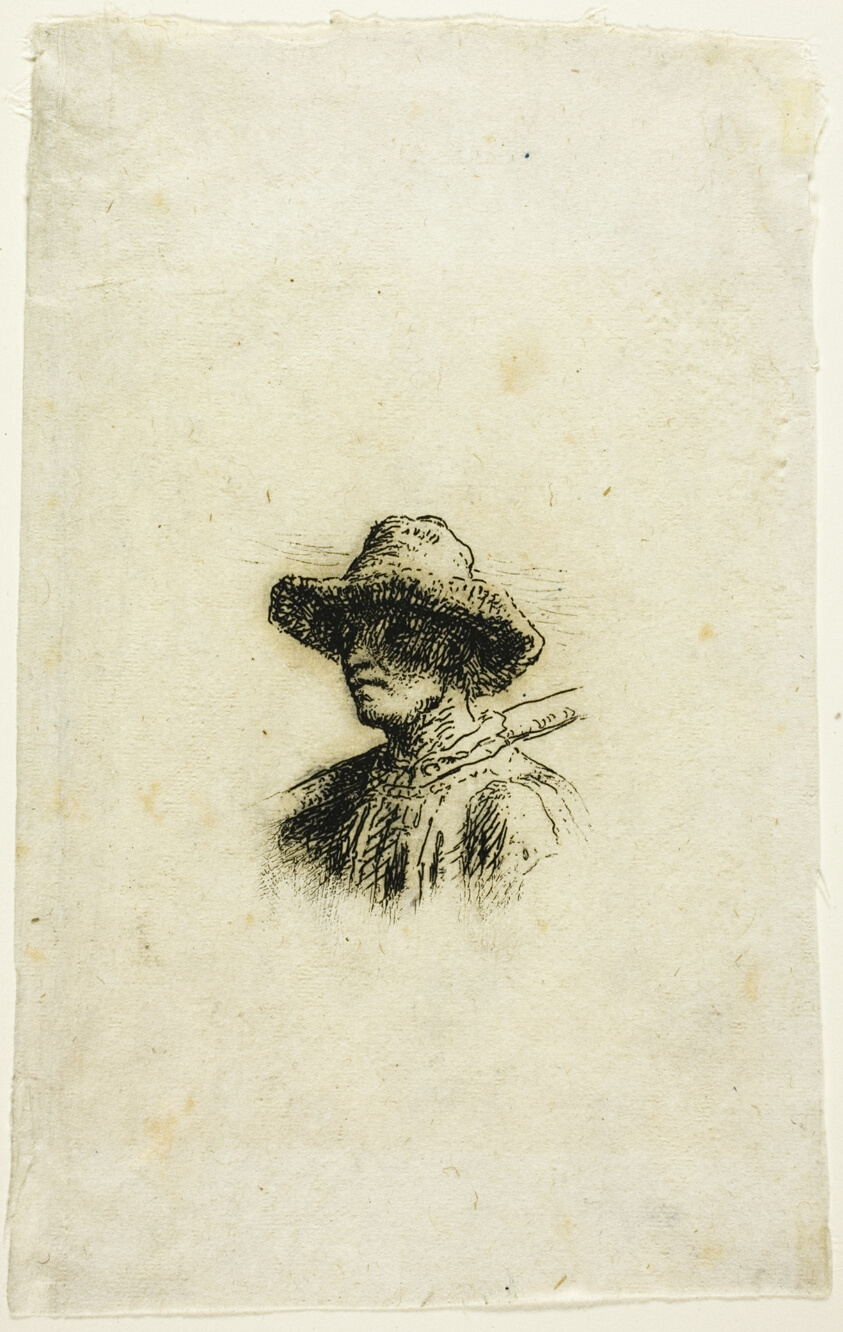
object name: Print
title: Peasants Going to Work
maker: Jean François Millet (French, 1814-1875)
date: 1863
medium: Etching from a portion of the plate on ivory laid chine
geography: France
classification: etching; print; prints and drawing